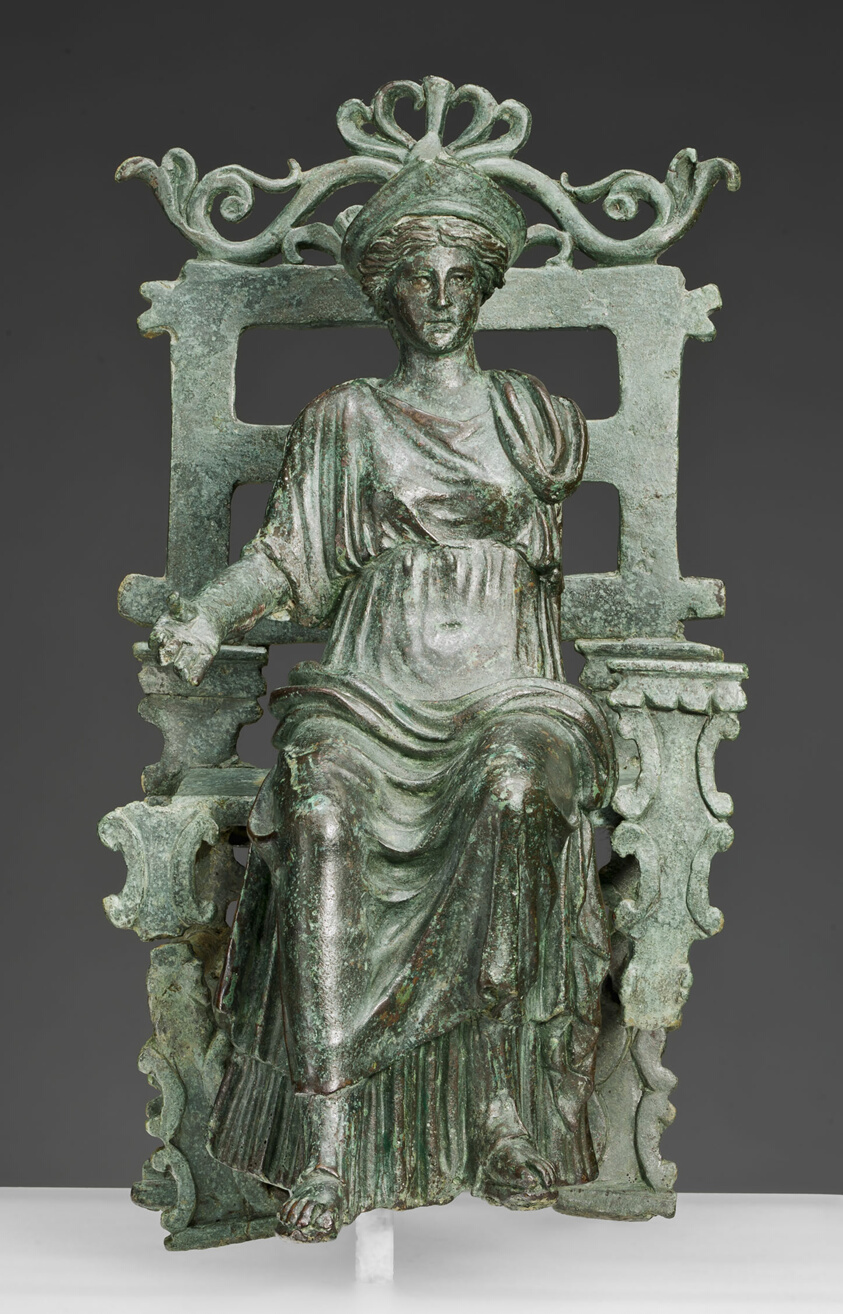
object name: Sculpture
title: Statuette of an Enthroned Figure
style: imperial (roman), ancient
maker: Roman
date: 1st century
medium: Bronze and silver inlay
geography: Roman Empire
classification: statuette; bronze; metal; sculpture; ancient art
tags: mythology, goddesses, gods (deities)